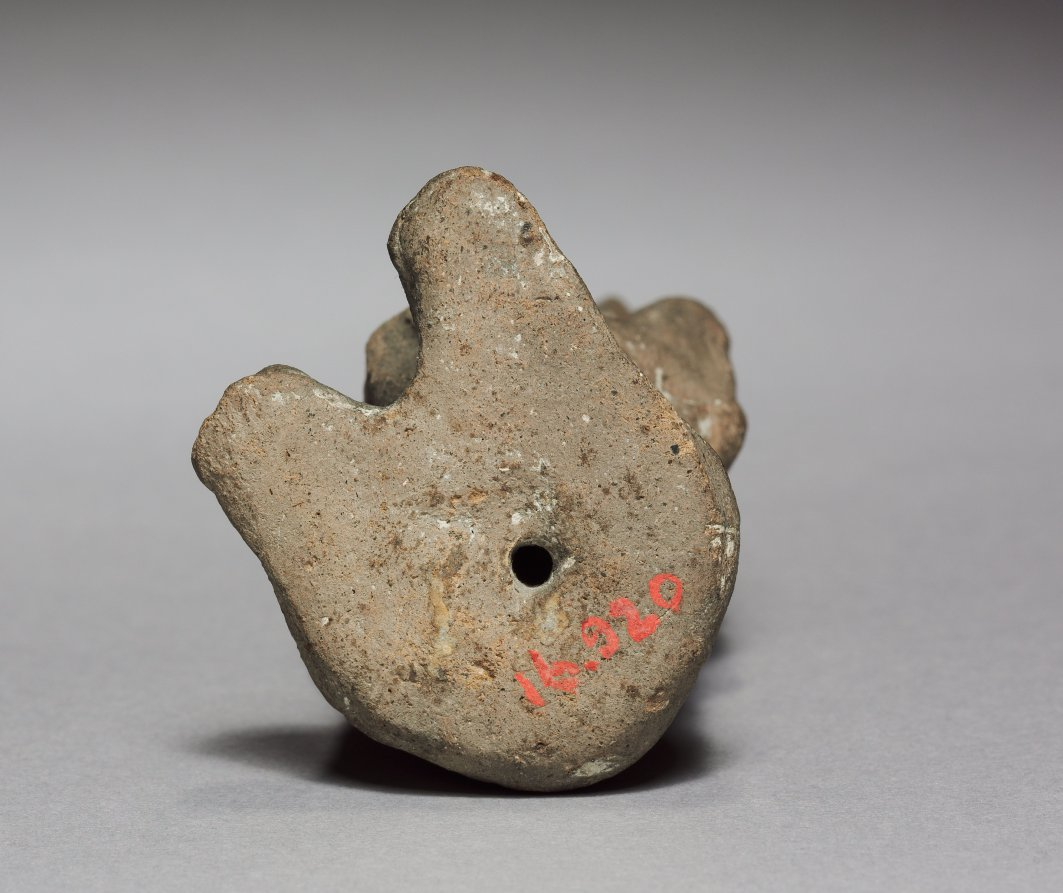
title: Figurine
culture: Mexico, Aztec, 14th century-16th century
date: 1325–1521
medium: terracotta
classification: Ceramic